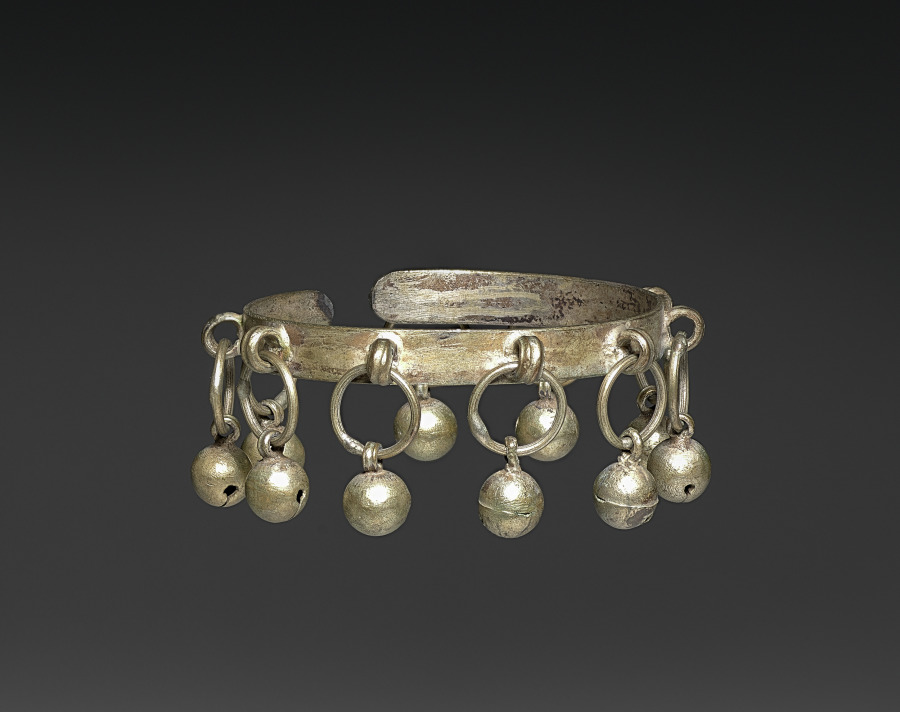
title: Wristlet or Anklet for Children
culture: India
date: early 1900s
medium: silver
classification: Jewelry